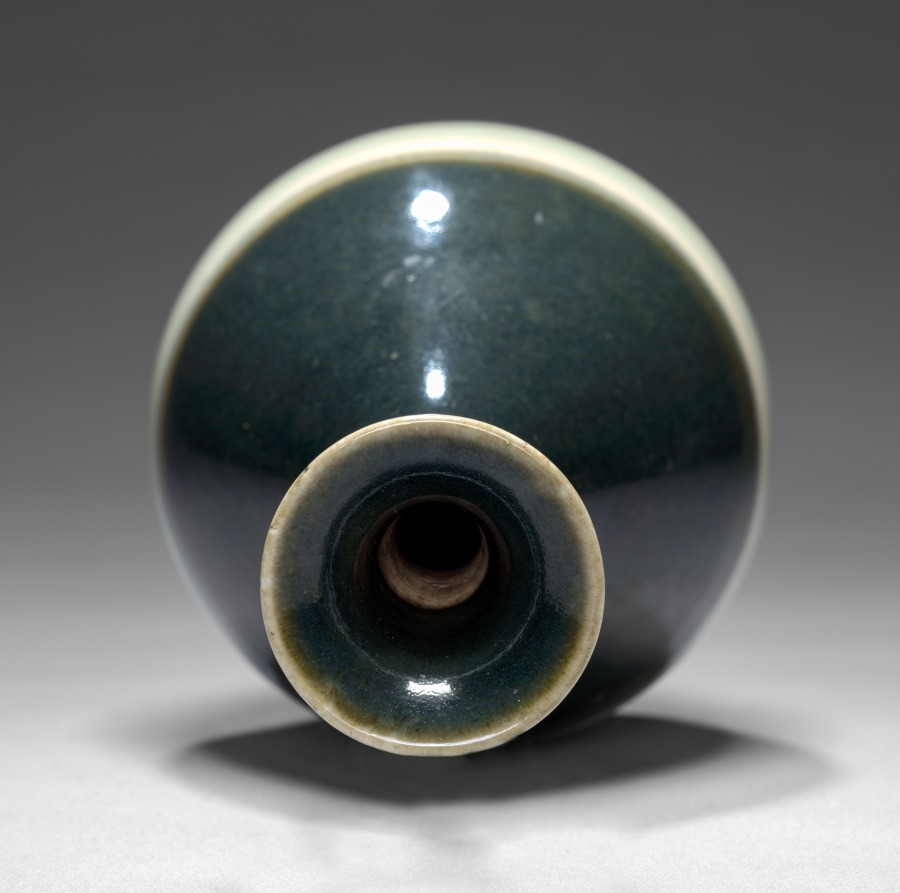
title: Sake Flask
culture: Japan, Edo period (1615–1868)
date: mid- to late 1600s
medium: porcelain with underglaze blue and overglaze celadon decoration (Hizen ware, Arita type, Imari style)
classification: Ceramic